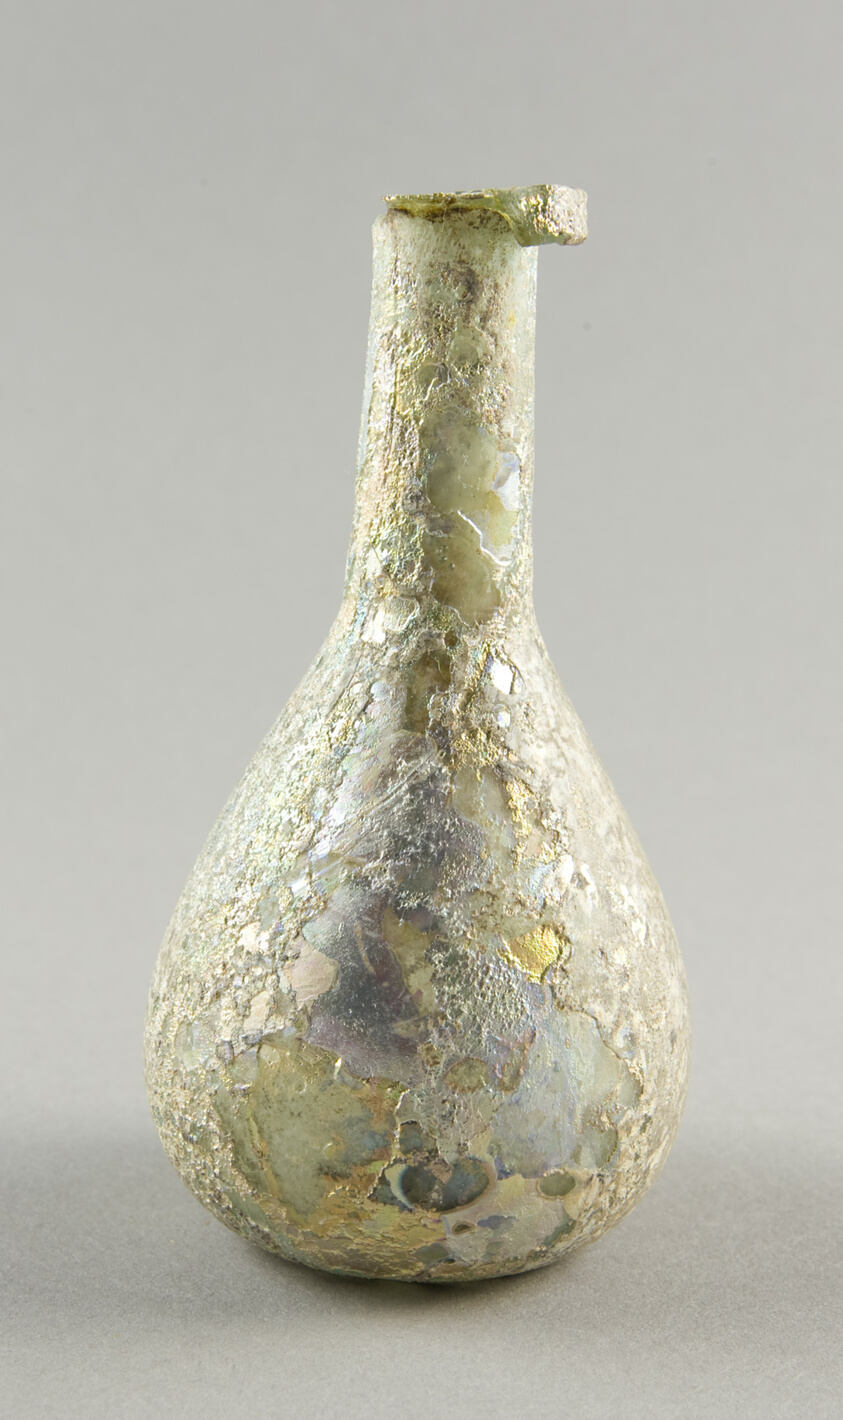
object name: Vessel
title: Bottle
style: ancient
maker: Ancient Mediterranean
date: 1st-3rd century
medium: Glass, blown technique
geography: Mediterranean Region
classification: glass; vessel; ancient art